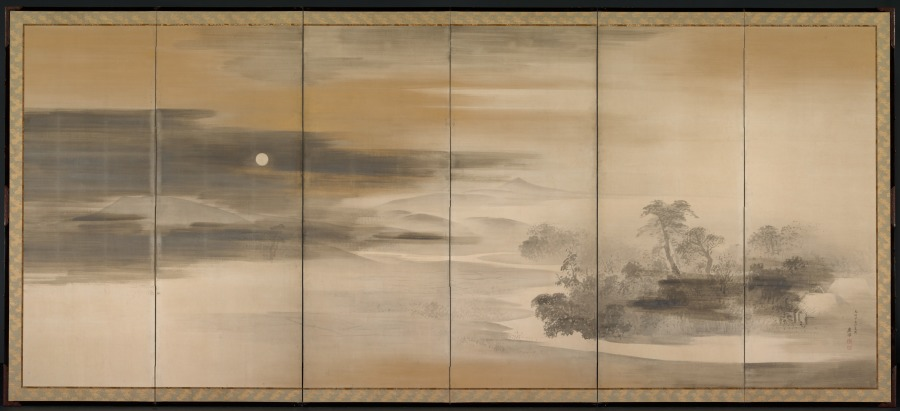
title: Summer Night; Winter Day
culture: Japan, Edo period (1615–1868)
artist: Maruyama Ōkyo (Japanese, 1733–1795)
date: 1784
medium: Pair of six-panel folding screens, ink, gold, and silver on paper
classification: Painting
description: Ōkyo painted these panoramas in the summer of 1784. Regarded as Kyoto's most important painting teacher and accomplished artist, he had studied Western painting techniques, "realistic" sketching from nature, and traditional Japanese style painting (yamato-e). The naturalistic quality of these scenes results from a blend of detailed observation of nature and a remote, even detached regard for man's place in the world.